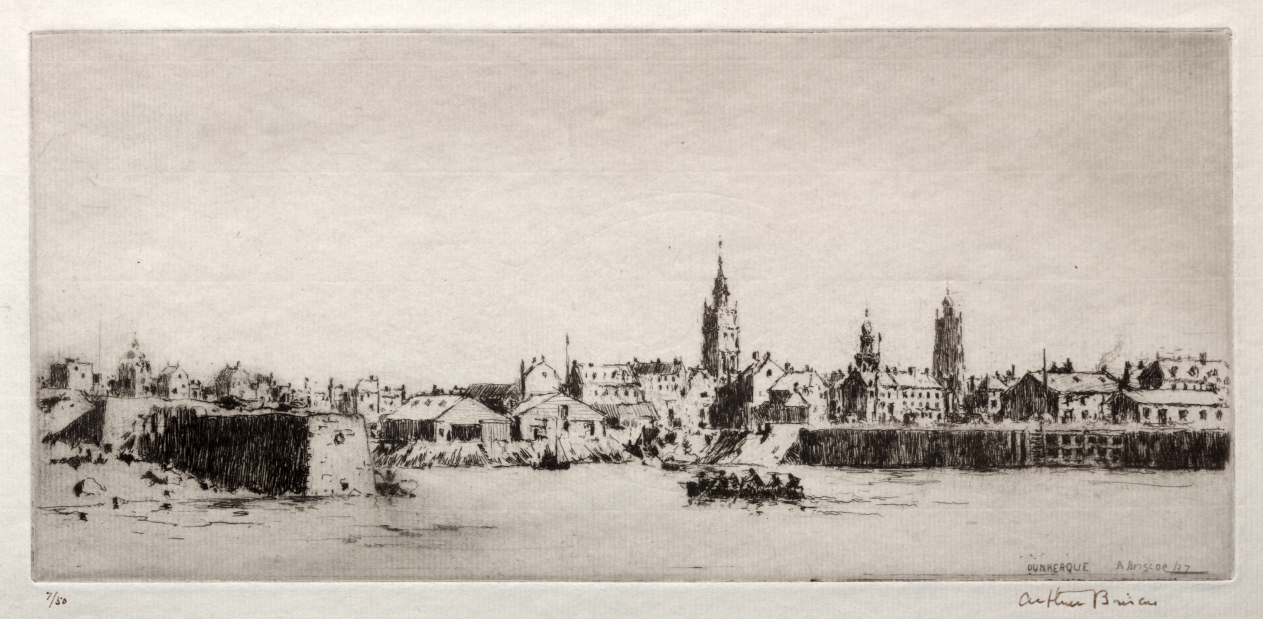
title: Dunkerque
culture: England, 20th century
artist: Arthur John Trevor Briscoe (British, 1873–1943)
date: 1937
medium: etching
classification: Print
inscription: Lower margin, in brown ink: 7/50 Arthur Briscoe